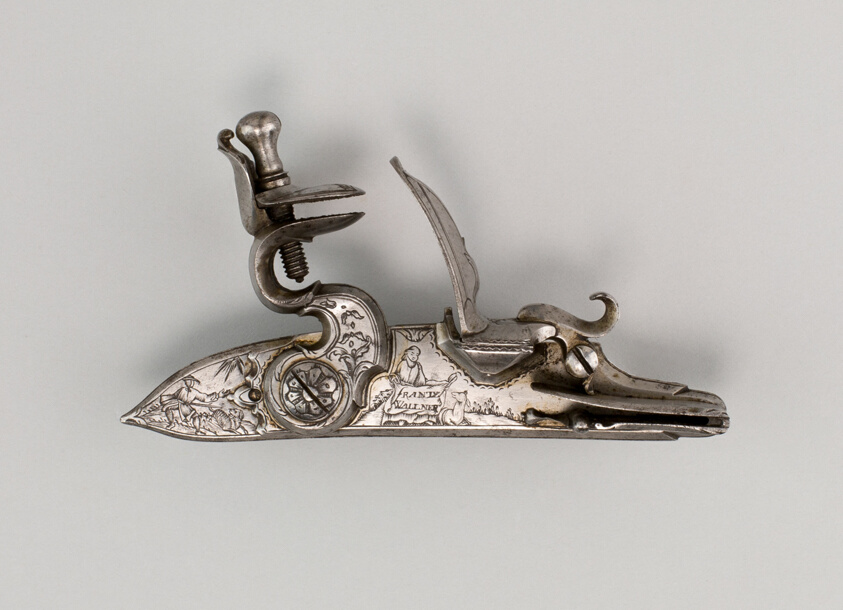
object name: Arms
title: Detached Flintlock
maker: German; Locksmith: Frantz Wallner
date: late 18th century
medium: Steel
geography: Europe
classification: firearm-accessory; arms; arms and armor